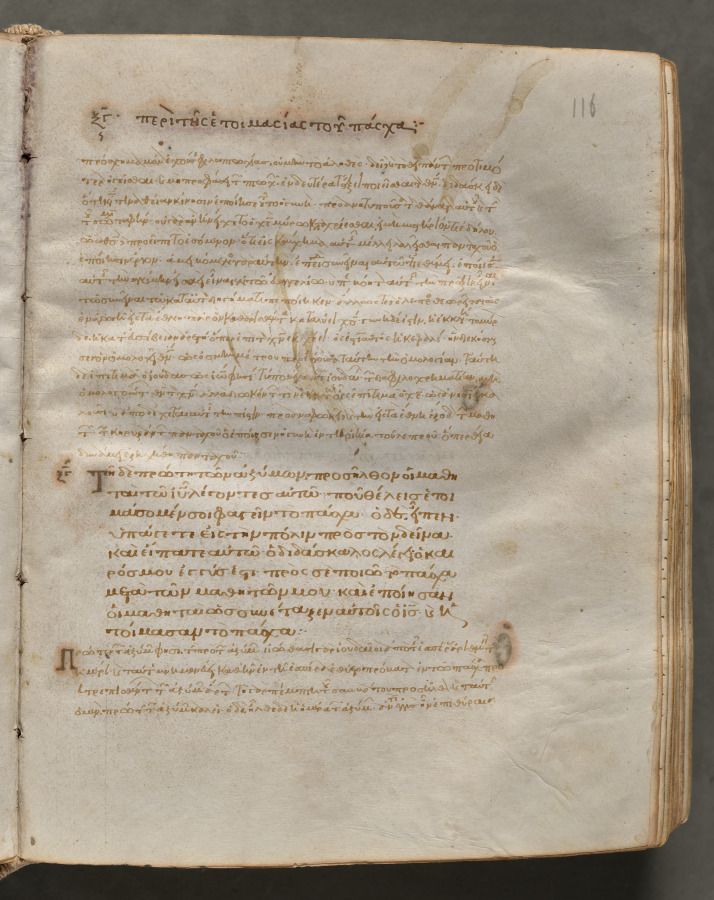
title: Text, folio 116 (recto), from a Gospel Book with Commentaries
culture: Byzantium, Constantinople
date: c. 1000–1100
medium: ink, tempera, and gold on vellum; leather binding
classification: Bound Volume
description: Each of the four gospels in this book opens on a page with brilliantly illuminated borders depicting the author of the text as well as birds-principally peacocks, symbols of the immortality of the soul-and fountains, representing the fountain of life and the salvation of the soul. This volume consists of 428 leaves with texts in Greek. Its level of sophistication suggests that it was probably written and decorated in a monastery in Constantinople.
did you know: Gospel Books were carried in procession through Byzantine churches.